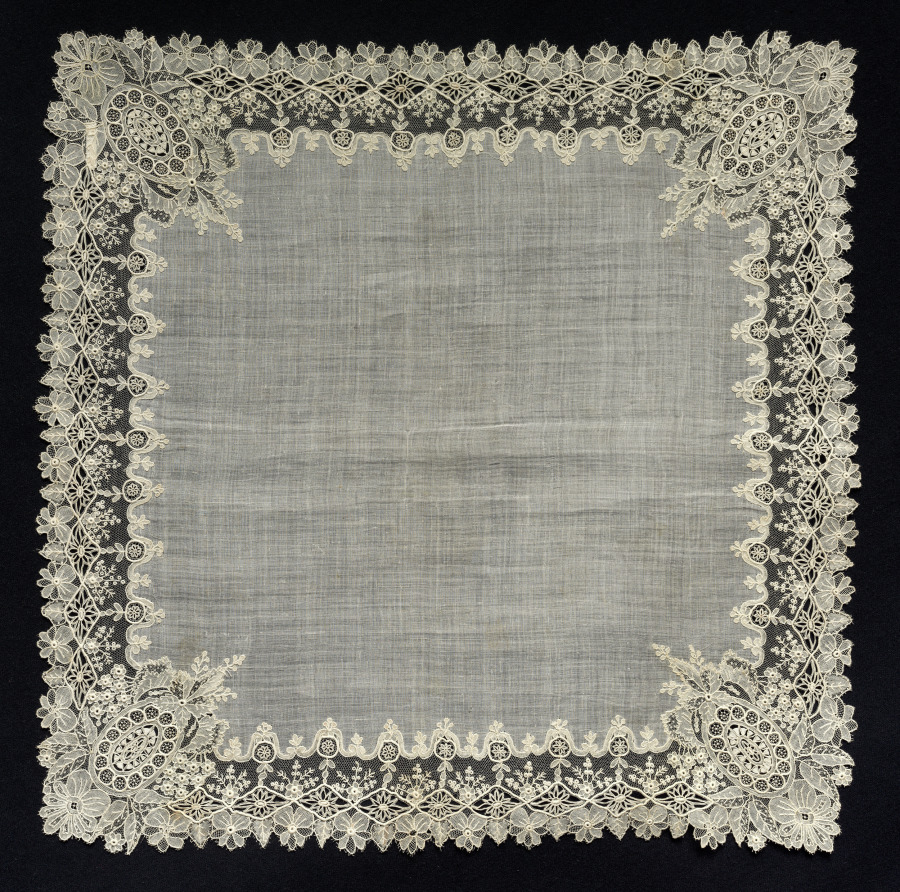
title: Lace Handkerchief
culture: Belgium, Brussels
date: 1800s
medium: Plain weave linen center; needle lace (point de gaze) edging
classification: Lace